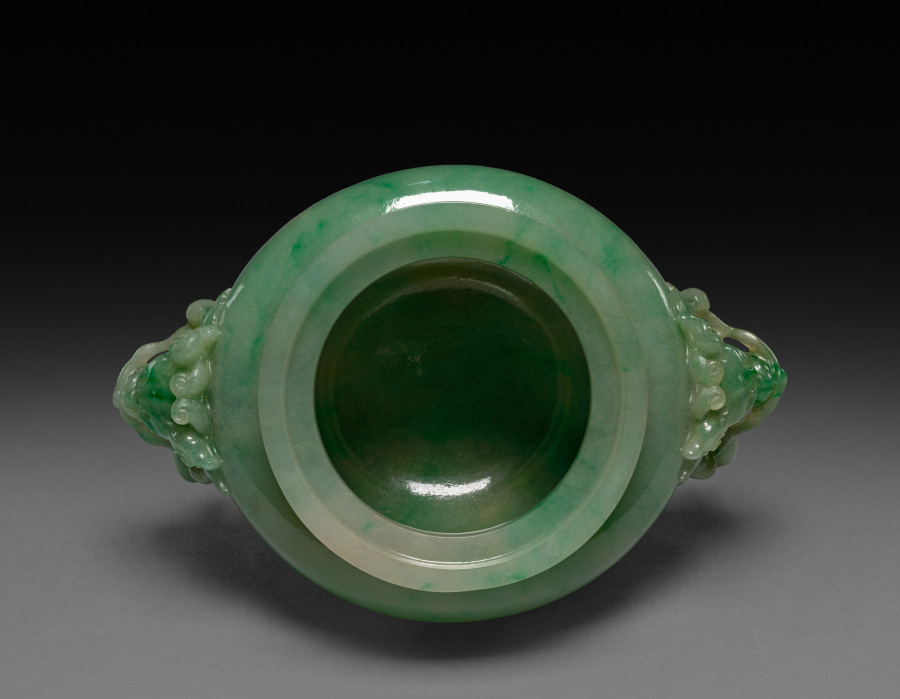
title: Tripod Vase: Ting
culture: China, Qing dynasty (1644-1911)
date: 1644–1911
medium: jade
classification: Jade